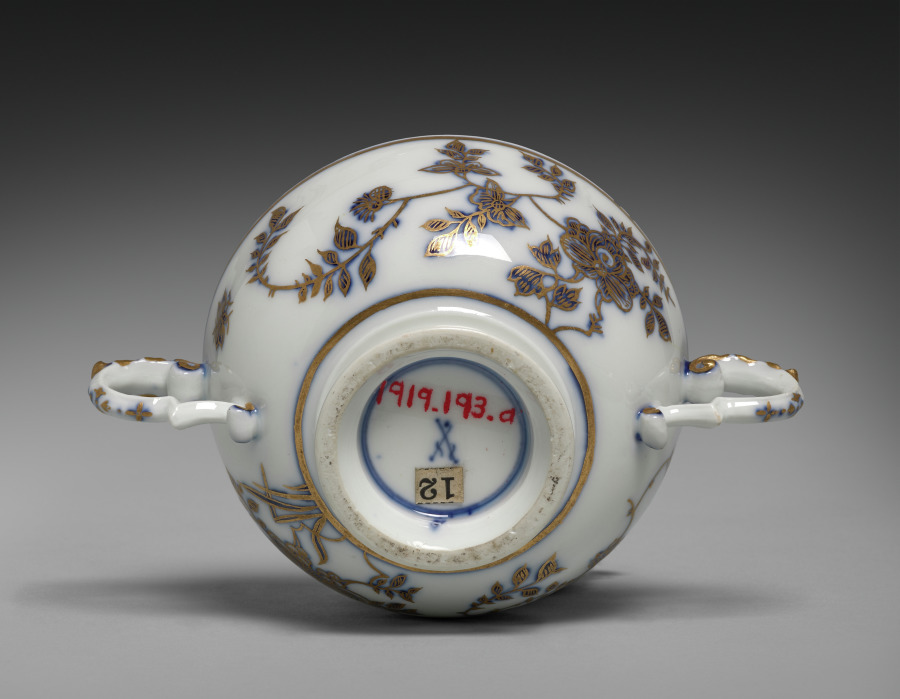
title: Broth Bowl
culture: Germany, Meissen, 18th century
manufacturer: Meissen Porcelain Factory (German, est. c. 1710)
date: 1730–40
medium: gilt porcelain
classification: Ceramic